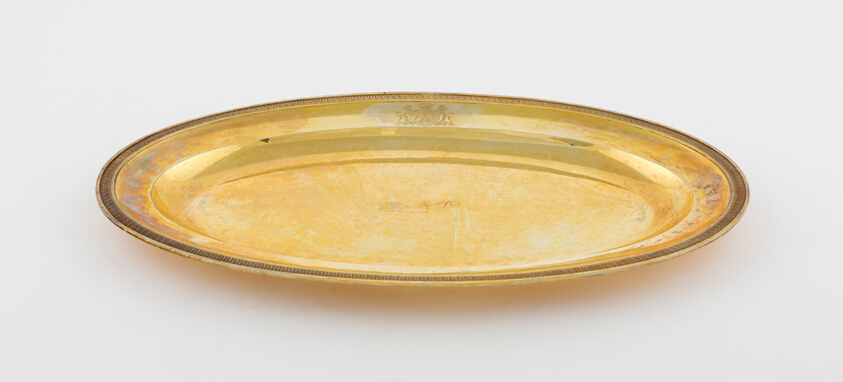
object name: Metalwork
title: Pair of Platters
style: Neoclassicism, empire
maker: Jean Baptiste Claude Odiot; French, 1753-1850; Paris, France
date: 1800/12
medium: Silver gilt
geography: Paris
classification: vessel for serving food; silver; dish (vessel); metalwork; european decorative arts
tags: dining